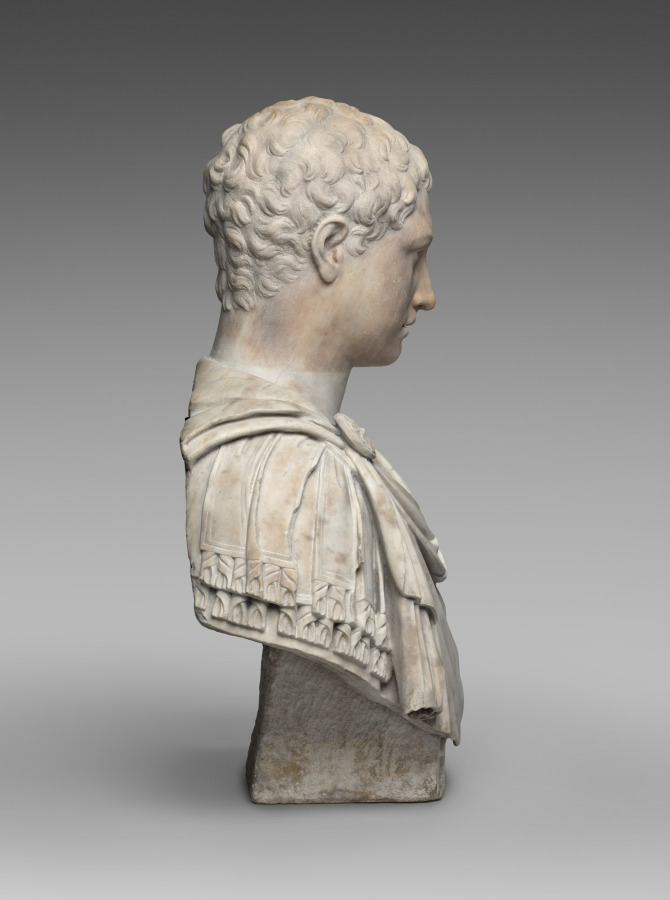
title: Bust of a Roman General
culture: Italy, 16th century or later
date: 1500s or later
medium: marble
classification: Sculpture